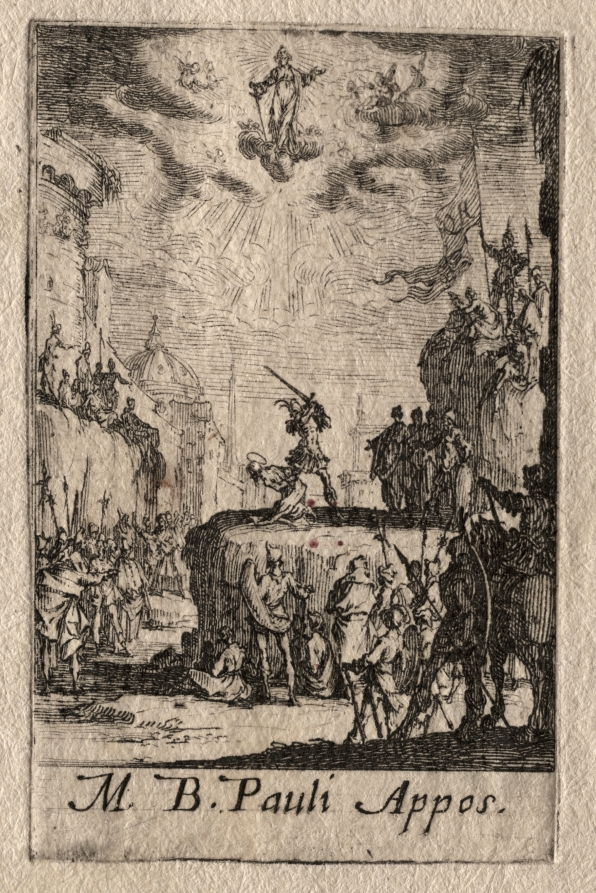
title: The Martyrdom of the Apostles: St. Paul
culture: France, 17th century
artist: Jacques Callot (French, 1592–1635)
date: ca. 1632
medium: etching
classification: Print